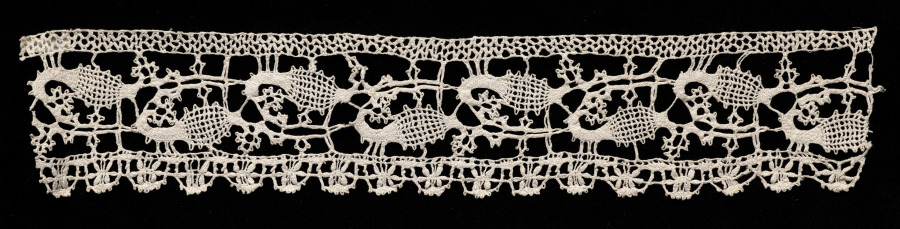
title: Lace Insertion and Edging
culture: Italy, Venice and Genoa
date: 1600–1640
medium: Bobbin lace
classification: Lace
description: In this bobbin lace fragment, the main body of the lace is Venetian while the edging is Genoese.